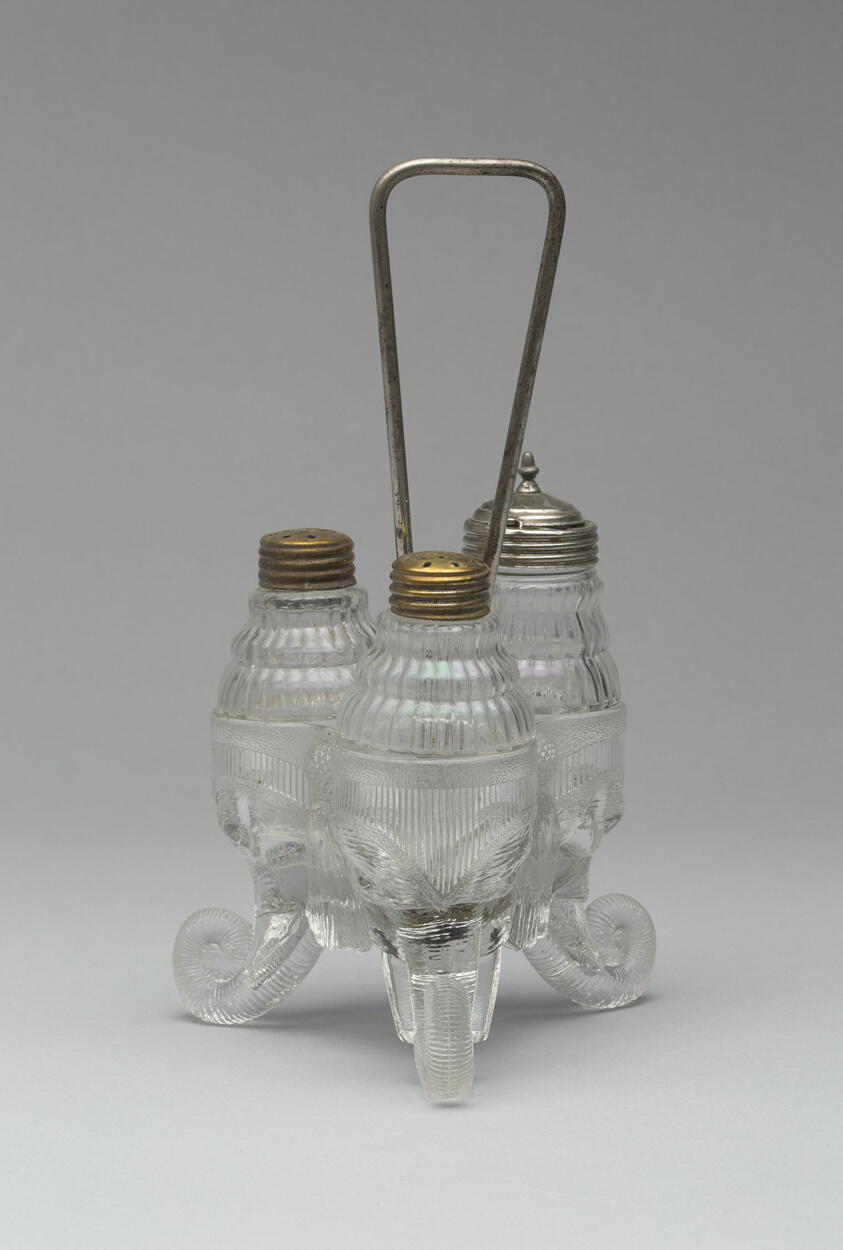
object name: Glass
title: "Jumbo"/Elephant pattern cruet stand with three bottles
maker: Attributed to Canton Glass Company; Canton, Ohio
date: 1883–5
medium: Glass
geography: Canton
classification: vessel for serving food; glass; cruet stand; cruet; bottle; american decorative arts; american arts; decorative arts